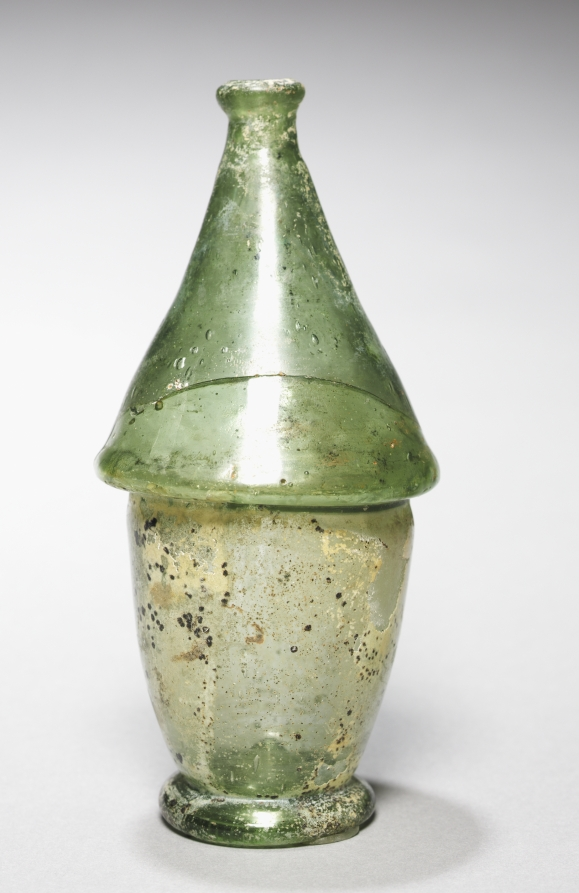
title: Double-Conical Bottle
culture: Germany, late 15th-early 16th century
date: c. 1500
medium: green glass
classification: Glass